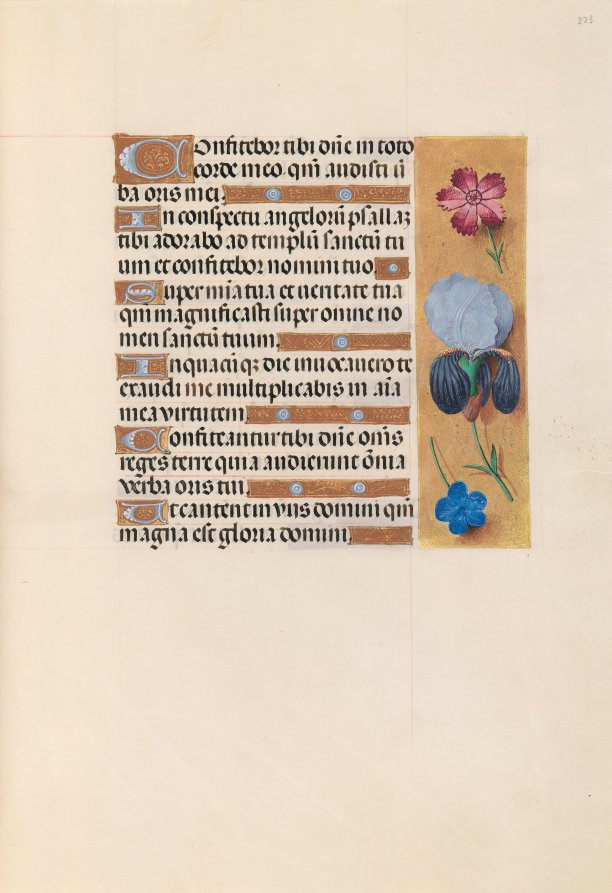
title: Hours of Queen Isabella the Catholic, Queen of Spain: Fol. 223r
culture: Flanders, Ghent and Bruges, late 15th century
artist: Master of the First Prayerbook of Maximillian (Flemish, c. 1444–1519)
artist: and Associates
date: c. 1500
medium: ink, tempera, and gold on vellum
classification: Bound Volume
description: This manuscript was illuminated by a circle of at least five highly organized manuscript painters active in the Flemish cities of Ghent and Bruges. The principal illuminator was Alexander Bening, who painted the majority of the book's miniatures. Manuscripts produced by this circle of artists are renowned for the decoration of their borders, which typically feature a rich variety of realistically-painted flowers, birds, and butterflies. This prayer book, called a book of hours, was intended not for a cleric, but for the private devotions of a lay person-in this case, Isabella the Catholic, Queen of Spain (1451-1504). Isabella's coat of arms embellishes the book's frontispiece. It is unlikely that the book was commissioned by the Queen herself; rather, she probably received it as a diplomatic gift from someone courting her patronage, perhaps Cardinal Francisco Jimenez de Cisneros. A Franciscan friar, Jimenez was dependent upon Isabella for his advancement, first to the post of Queen's confessor in 1492, and then to Archbishop of Toledo in 1495.